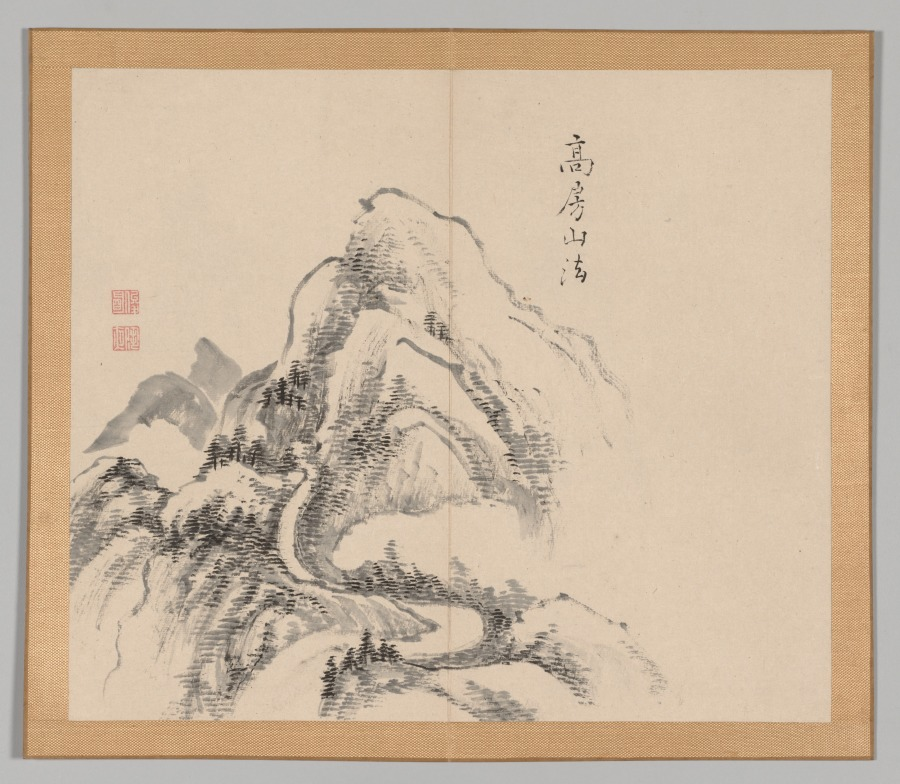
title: Reverberations of Taiga, Volume 1 (leaf 34)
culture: Japan, Edo period (1615–1868)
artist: Aoki Shukuya (Japanese, d. 1802)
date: mid- to late 1700s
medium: double-leaf from a pair of albums; ink and light color on paper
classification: Portfolio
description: Traditionally, young painters in Japan began their studies with an established master-painter. The master's compositions invariably became models that the apprentice copied to learn various ink and brush techniques. Shukuya was a pupil of the famous Kyoto artist Ikeno Taiga, whose style is reflected in these sketches of rocks, trees, and mountains.